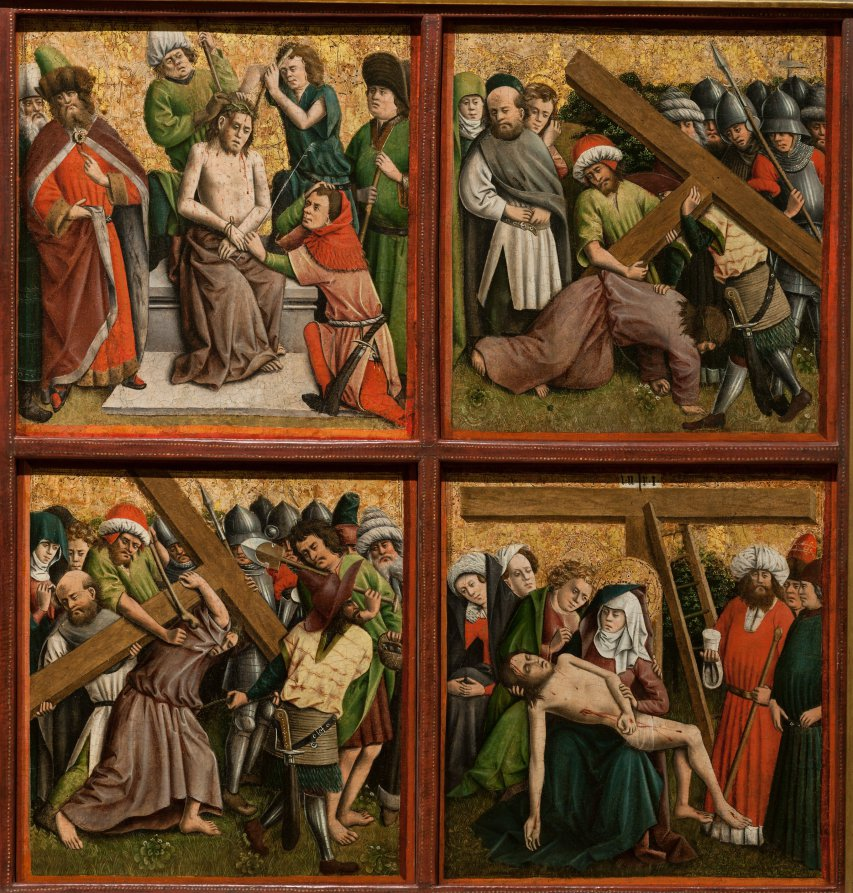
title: Altarpiece with The Passion of Christ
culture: Germany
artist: Master of the Schlägl Altarpiece (German)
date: c. 1440s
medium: oil and gold on wood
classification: Painting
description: The visual focus of this altarpiece is the suffering and death of Christ on the cross. So-called Passion cycles in art include the events leading up to and following the Crucifixion, not only as single subjects but as scenes meant to be read in sequence. Passion cycles were promoted by the two great teaching orders, the Franciscans and the Dominicans, for whom this subject represented the main religious drama of their churches, and also by the German mystics who advocated private contemplation on the humanity and suffering of Christ. The original context for this altarpiece remains unknown, but it was probably made for a religious institution in Westphalia in the Rhine Valley. During the 1870s it was given to the Abbey of Schlägl, near Linz in Upper Austria, from which both altarpiece and artist take their names. The altarpiece is not preserved today in its original format, and some of the individual scenes are missing. Scholars continue to debate the original number of scenes and their sequencing; nine of the original panels have survived, four are shown here.